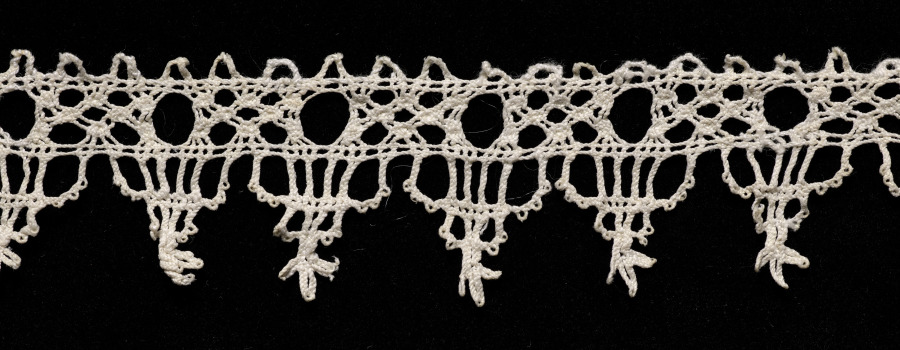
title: Lace Edging of Points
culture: Italy, Venice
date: 1540–60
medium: Bobbin lace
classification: Lace